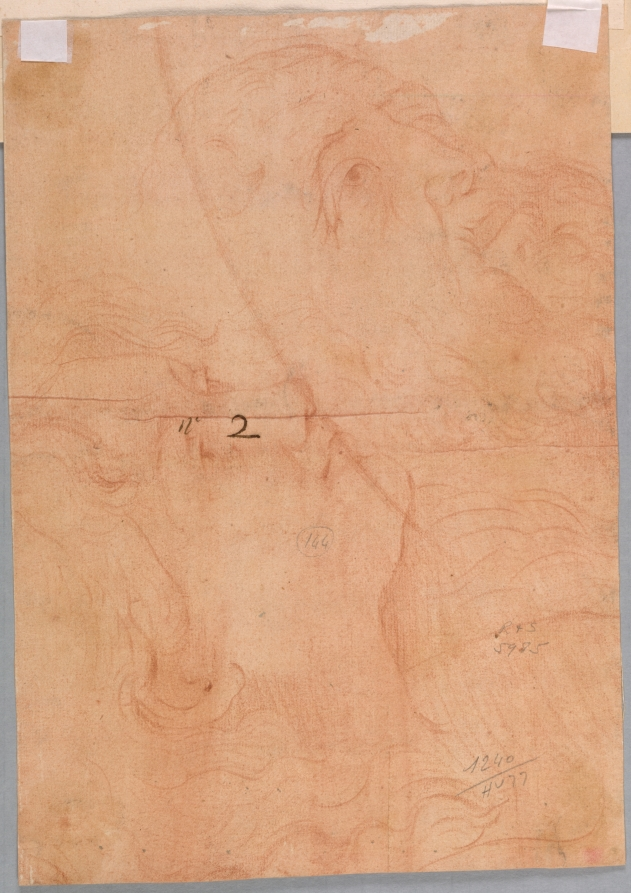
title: Café in Constantinople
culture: France, 19th century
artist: Alexandre Bida (French, 1823–1895)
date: 1847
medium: brush and black and gray ink, graphite, and stylus on white wove paper coated with a white ground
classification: Drawing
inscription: signed, lower right, in black ink and stylus: Alex Bida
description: This precise and carefully finished work reflects an unusual technique. Building up the entire area with ink and graphite over white chalk, Bida used a stylus to scratch a comprehensive network of tiny lines, providing highlights and picking out details. For his Orientalist subjects, Bida traveled repeatedly to the Near East-the first time in 1843 when he went to Constantinople and Syria from Venice. Although he closely observed the costumes and people encountered overseas, the decorative arrangements and symmetrical space in this draw-ing exemplify the theatrical aspects of Bida's art.